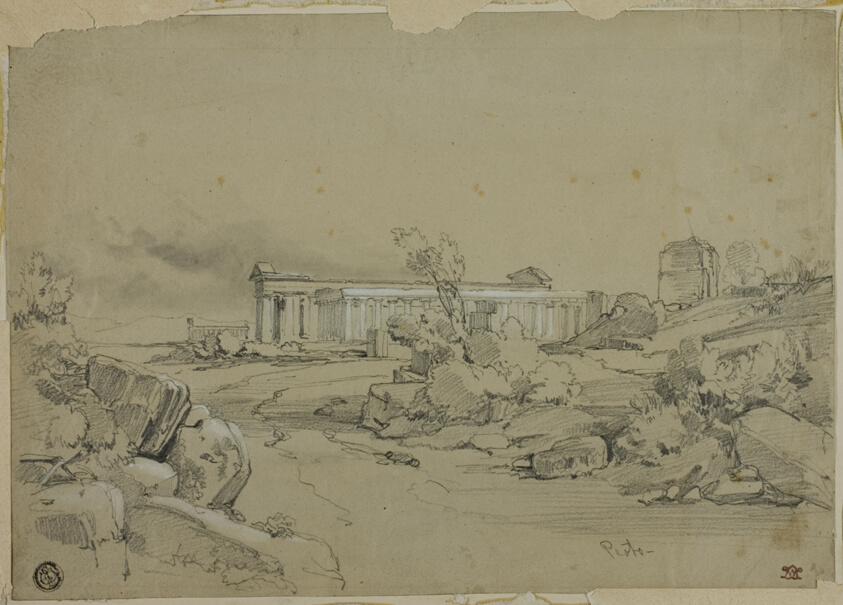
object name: Drawing and Watercolor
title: Pesto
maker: William Leighton Leitch (Scottish, 1804-1883)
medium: Graphite, with stumping, and with touches of brush and white gouache, on grayish-tan wove paper, laid down on buff board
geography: Scotland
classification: graphite; drawings (visual works); prints and drawing